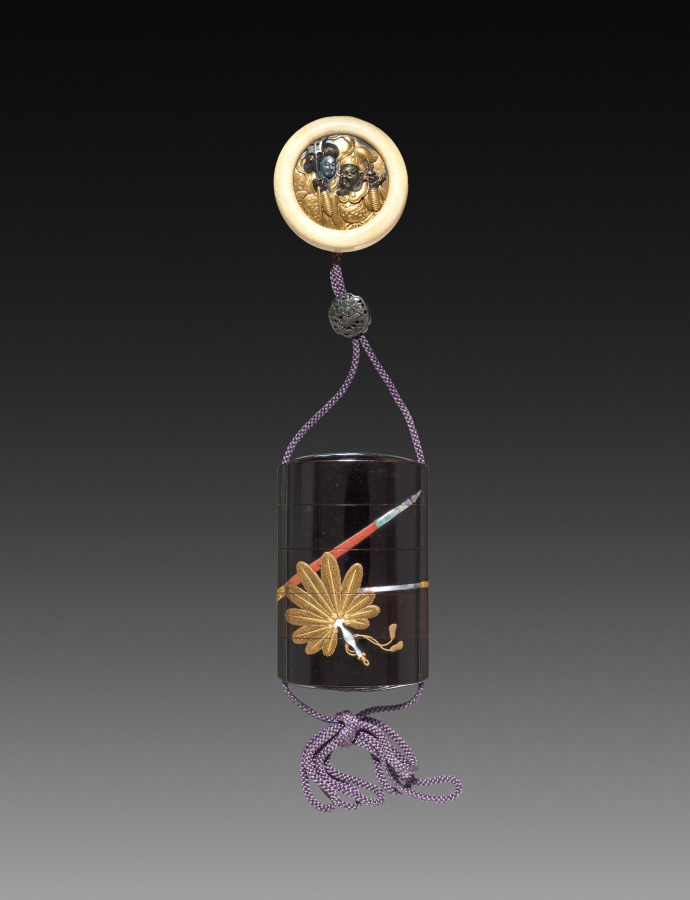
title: Inro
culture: Japan, Edo period (1615–1868)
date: 1615–1868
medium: lacquer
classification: Lacquer